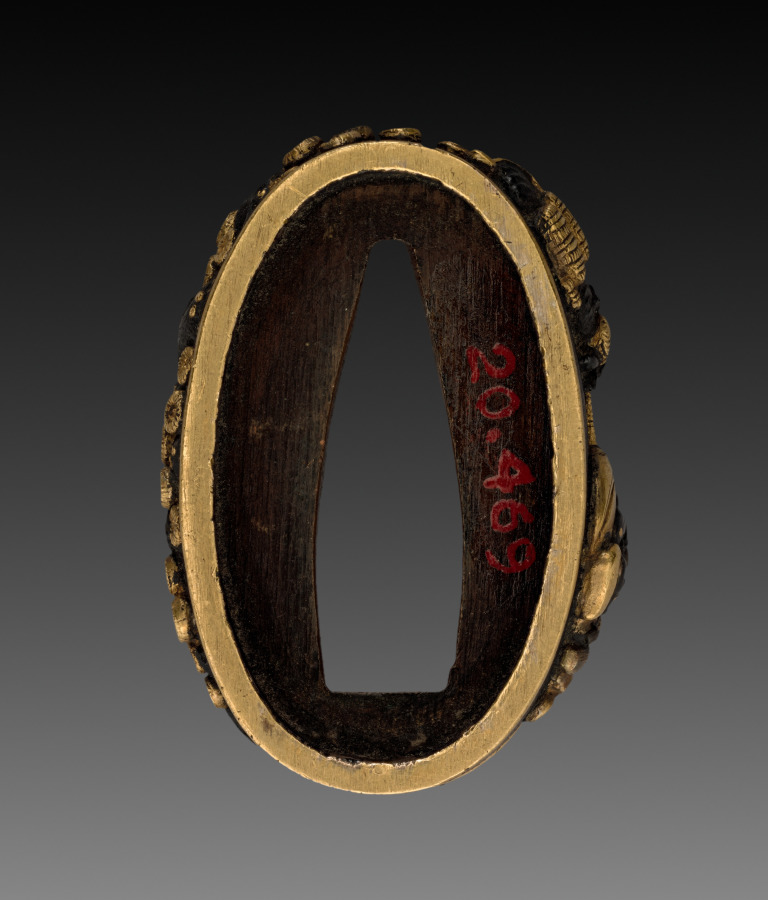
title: Sword-Hilt Collar (Fuchi)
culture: Japan, Edo period (1615–1868)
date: 1700–1850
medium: shakudo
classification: Arms and Armor